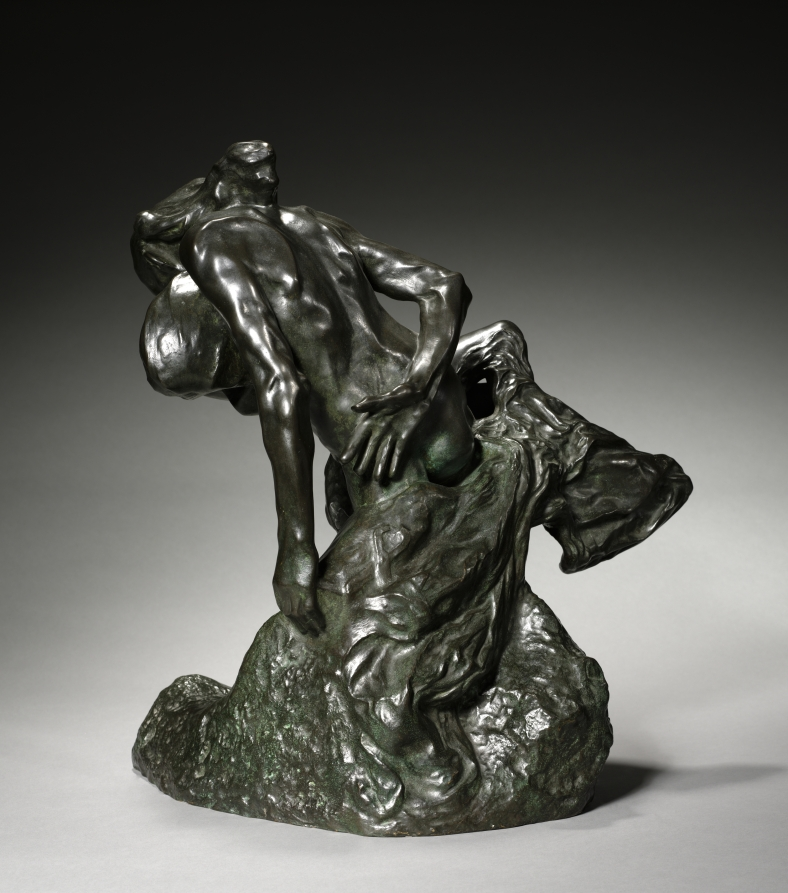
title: Triumphant Youth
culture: France, 19th century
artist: Auguste Rodin (French, 1840–1917)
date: c. 1894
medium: bronze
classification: Sculpture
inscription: Signed front left: "A. Rodin"